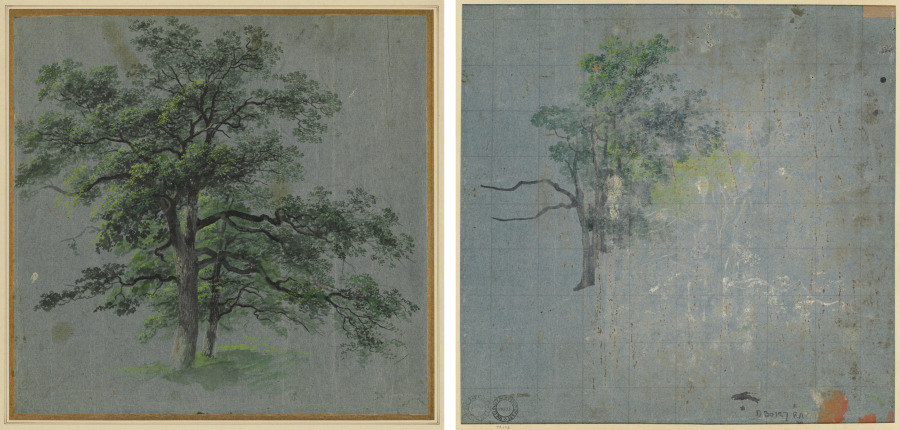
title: Two Trees (recto) Tree Studies (verso)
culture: Germany, 19th century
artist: Johann Jacob Dorner (German, 1775–1852)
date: first half 1800s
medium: brush and black and gray wash, gouache, and watercolor, with stylus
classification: Drawing